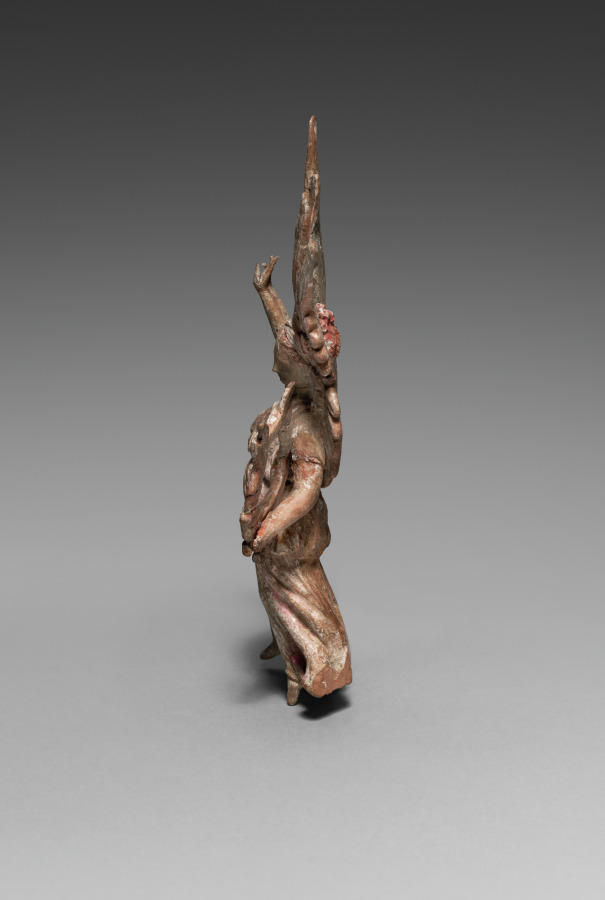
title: Figurine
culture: Greece, Myrina, Hellenistic period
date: 300–100 BCE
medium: terracotta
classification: Sculpture